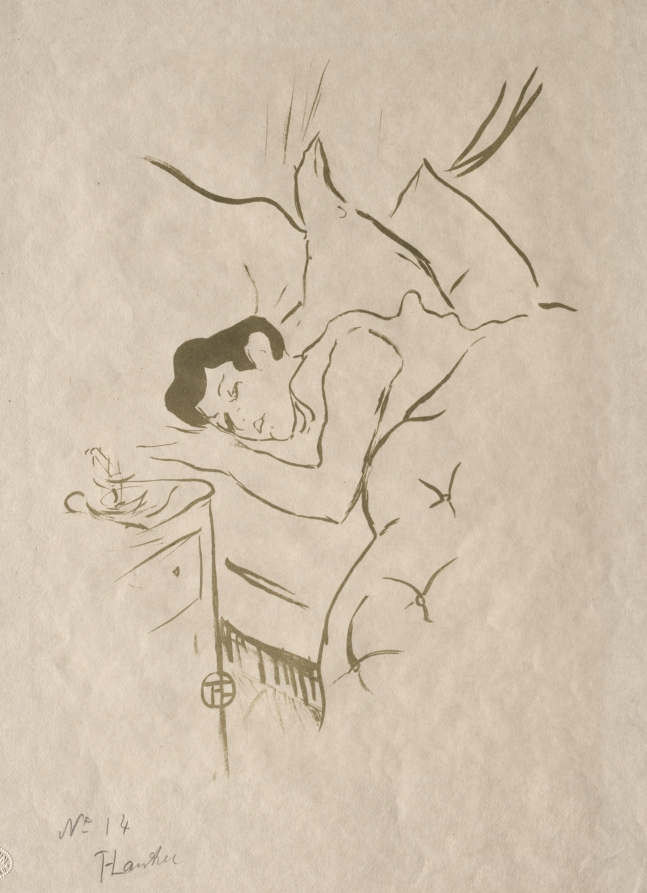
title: Les Vieilles histoires: Ta Bouche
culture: France, 19th century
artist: Henri de Toulouse-Lautrec (French, 1864–1901)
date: 1893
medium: lithograph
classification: Print